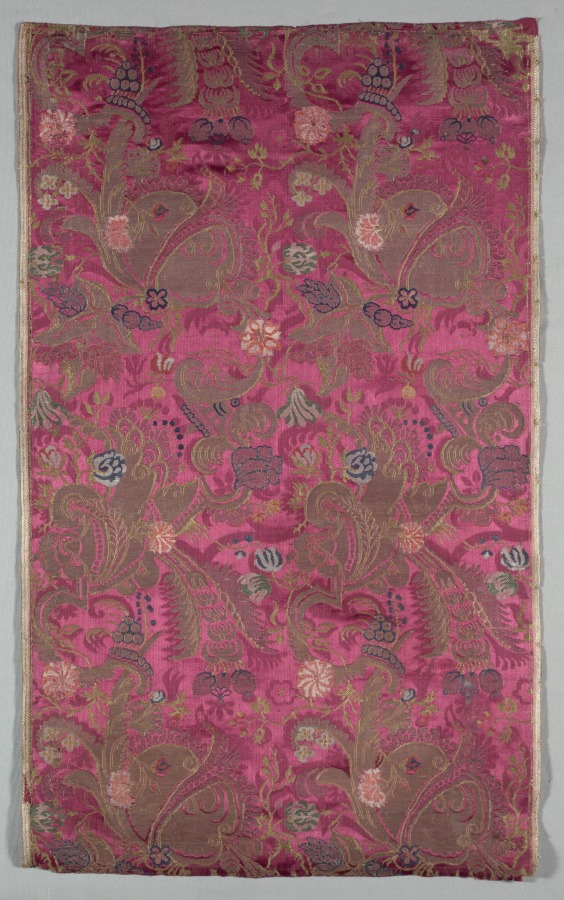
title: Lengths of Textile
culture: France or Italy, early 18th century, period of Louis XIV (1643-1715)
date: c. 1700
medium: brocade; silk, gold and silver threads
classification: Textile